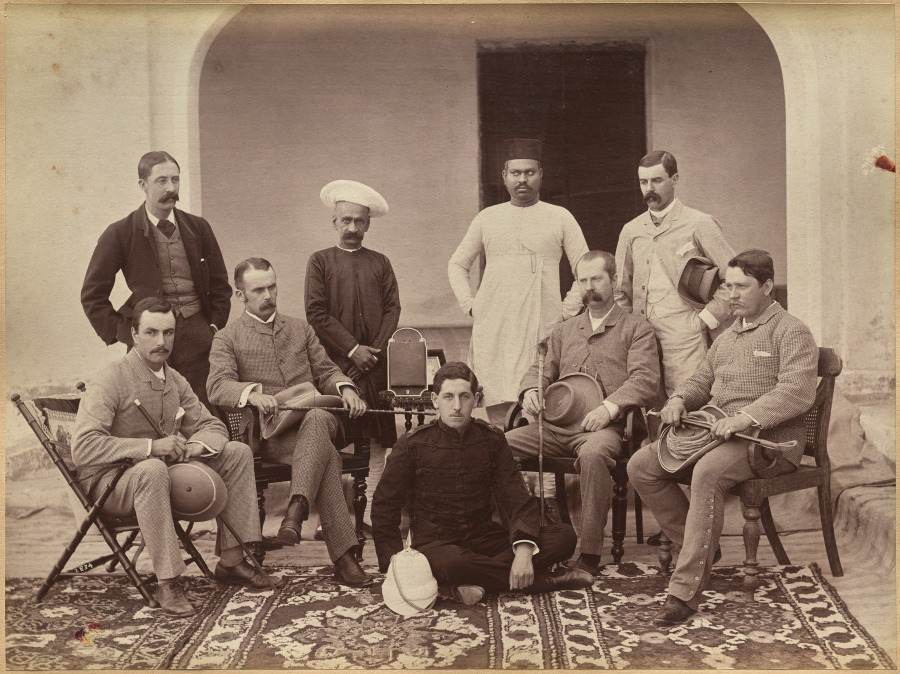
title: Civil officers at Jhansi (recto)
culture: India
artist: Raja Deen Dayal (Indian, 1844–1905)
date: c. 1882–87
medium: albumen print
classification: Photograph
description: These photographs are part of an album, now disassembled, of around 105 photographs taken in India between 1885 and summer 1887 that provide glimpses into the lives of the British colonial elite and royal and upper-class Indians. The museum holds another group of 37 pictures from this album (2016.266), which was probably commissioned by a British civil servant visiting or working in India around 1888 as a personal souvenir of his experiences there.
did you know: Raja Deen Dayal is regarded now, and was considered during his lifetime, to be India’s most important 19th-century photographer.